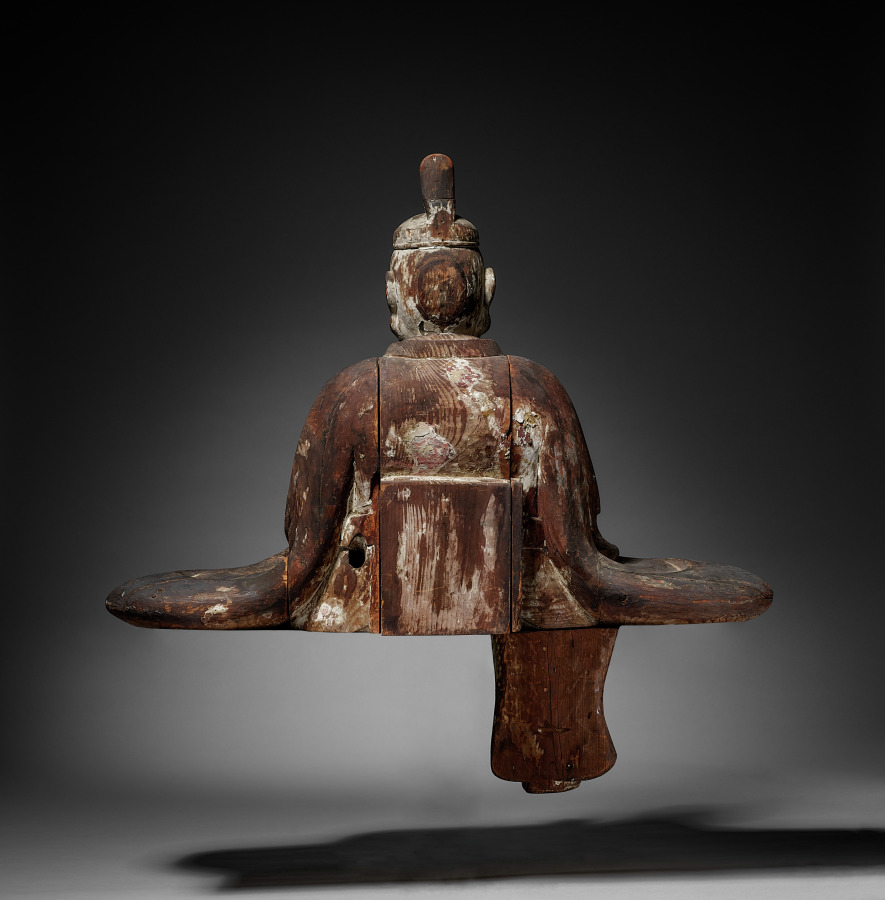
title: One of a Pair of Guardian Figures (Zuishin)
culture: Japan, Muromachi period (1392–1573) to Edo period (1615–1858)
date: c. 1560–1625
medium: Japanese cypress (hinoki) with traces of color; crystal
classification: Sculpture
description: Sculptors carved these two figures to look like members of the guard who protected the Japanese aristocracy in the 10th to 12th centuries. The pair belong in the roofed gate of a Shinto shrine. Their role was to embody the divine protectors of the deities, or kami, residing at the shrine. Their inset crystal eyes make them appear vigilant.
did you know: Some Japanese sculptors used to specialize in inset crystal eyes.